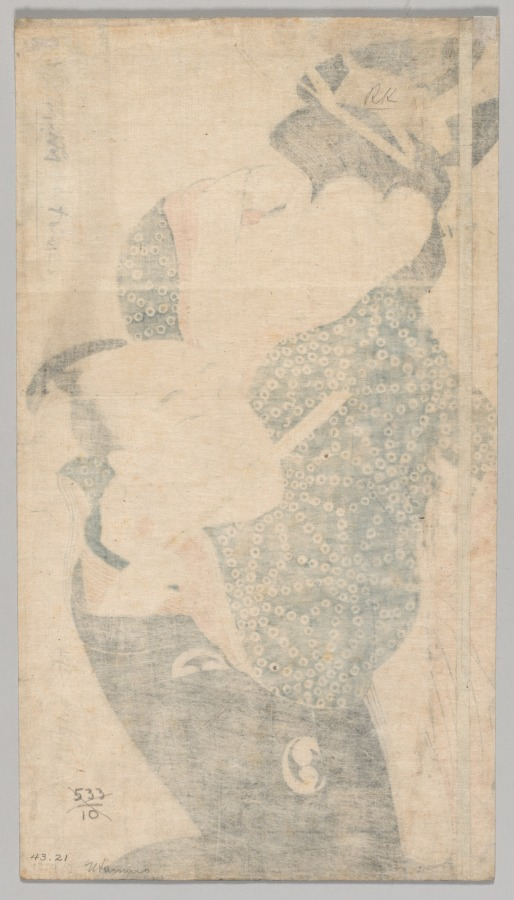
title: Man and Woman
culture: Japan, Edo period (1615–1868)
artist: Kitagawa Utamaro (Japanese, c. 1754–1806)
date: 1753–1806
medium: color woodblock print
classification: Print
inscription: Signature: Utamaro fude